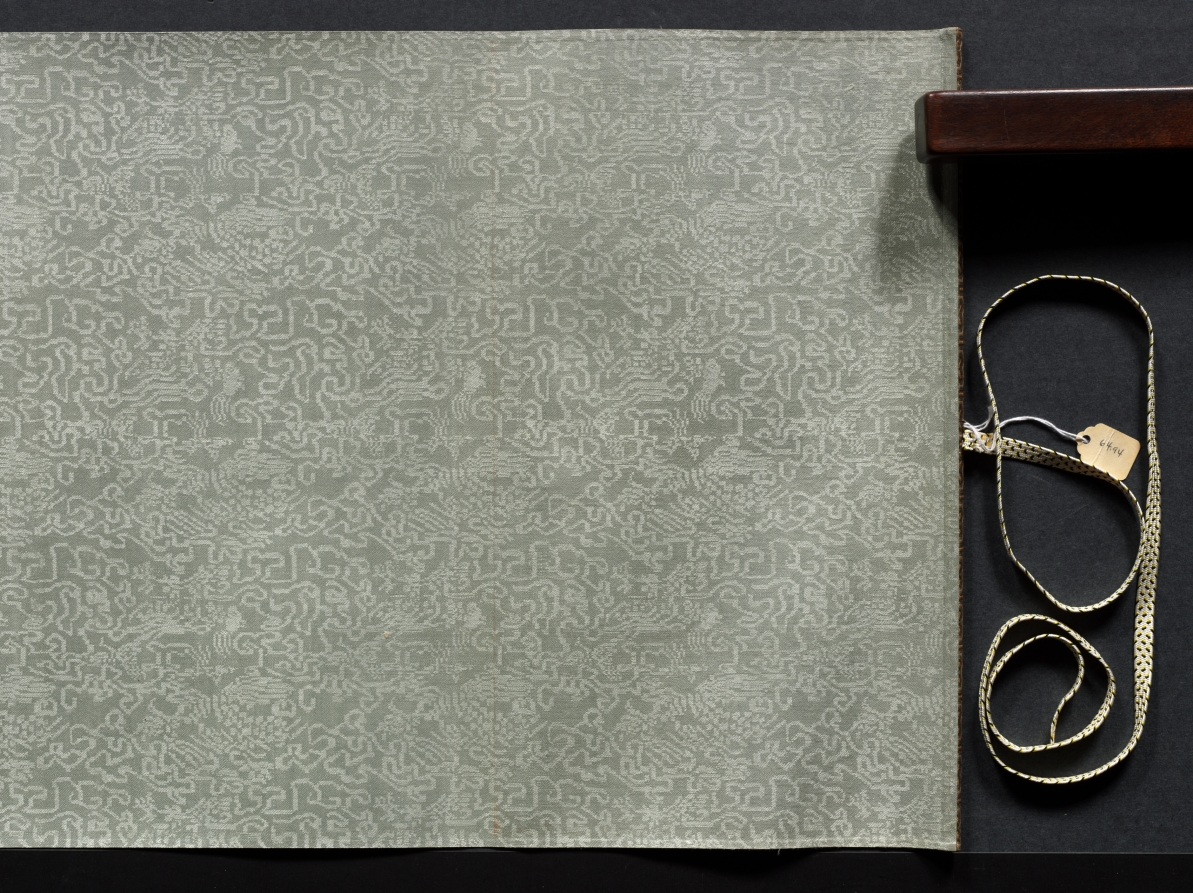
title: Beggars and Street Characters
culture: China, Ming dynasty (1368–1644)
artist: Zhou Chen (Chinese, c. 1450–c. 1536)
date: 1516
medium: Handscroll; ink and light color on paper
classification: Painting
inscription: 題: 周臣流氓圖. 古堇趙鶴琴 [印] 老鶴臨池; 鵝池軒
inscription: 正德丙子秋七月，閒窗無事 ，偶記素見市道丐者種種態度。乘筆硯之便，率爾圖寫。雖無足觀，亦可以助警勵世俗云。 東邨周臣記 [印]東邨; 舜卿; 鵝場散人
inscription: 吳中東邨周君，善丹青，尤長於人物。此圖其所見盛市丐者之狀種種，各盡其態，觀者絕倒。嗟乎，今之晝夜乞哀以求富貴者，安得起周君而貌之耶。臥雲徵君出示，余漫題其後。 甲子歲十月吳門黃姬水 [印] 士雅山人; 另一印不詳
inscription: 是冊凡數種。其飢寒流離疲癃殘疾之狀，種種之異。觀此而不惻然心傷者，非仁人也。計正德丙子逆瑾之流毒已數年。而[江]彬 [錢] 寧輩肆虐方熾。意分符剖竹諸君，亦鮮有能撫字其民者。然則舜卿此作，殆與鄭君 流民圖同意。其有補於治道者不淺，要不可以墨戲忽之也。 長洲張風翼題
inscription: 東村此筆，蓋圖寫飢寒乞丐之態，以警世俗耳。而質山 [黃姬水]欲其寫昏夜乞哀，而靈墟[張鳳翼]則擬之於安上門圖。二君之見，其各有所指哉。昔唐六如每見周筆，輒稱曰：周先生！蓋深服其神妙之不可及。若此冊者，信非他人可能而有符於六如之心伏矣。豈易得耶。若黃、張之指，則又論於畫之外，不在於形似筆墨之旨也。 萬歷丁丑十二月三日 茂苑文嘉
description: Zhou Chen from Suzhou provides rare depictions of impoverished people that once filled the city’s markets and streets. Despite Suzhou’s prosperity, its rapid growth polarized society, including the wealthy and those who had deserted their farmlands, who were without homes, unemployed, or sick. Amid these are figures who inspire fear rather than empathy. The painting may thus be informed by local practices at the end of the lunar year, in which street beggars, in exchange for food or money, would dress up like ghosts and demons to drive out evil forces.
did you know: Although Zhou Chen's original composition was an album of 24 figures, today it is mounted as two handscrolls, one in the Cleveland collection and one in the Honolulu Museum of Art.